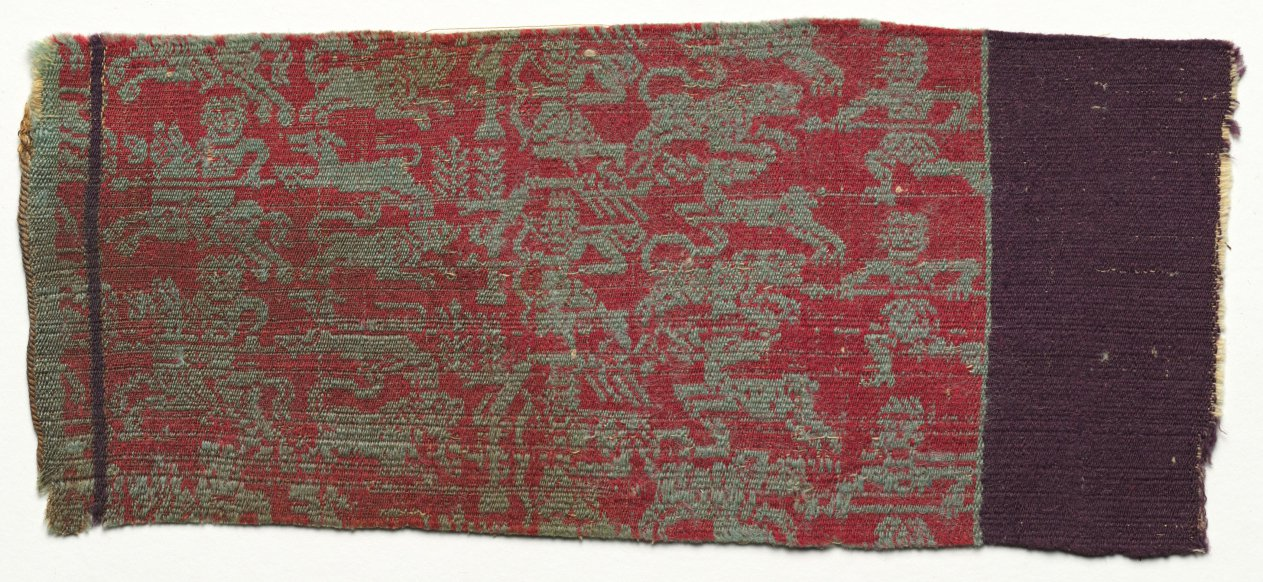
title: Fragment (from a Tunic?)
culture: Egypt, Byzantine period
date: 500s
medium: compound tabby; wool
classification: Textile